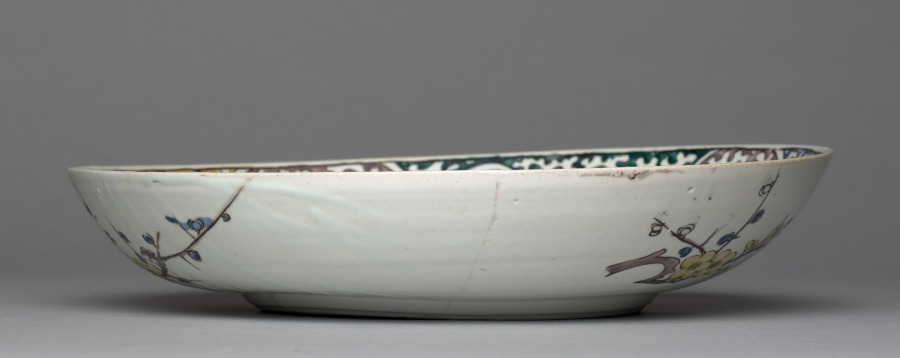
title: Plate with Bird and Flower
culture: Japan, Meiji period (1868–1912) or Taishō period (1912–26)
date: early 1900s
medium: Porcelain with overglaze enamel (Ko-Kutani revival style)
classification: Ceramic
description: This dish is a sophisticated example of later ceramists reinterpreting earlier styles of Japanese porcelain. The colors and patterns used look similar to some works produced on the island of Kyushu in the1600s and 1700s. However, the idea to combine alternating blocks of yellow, green, purple, and blue with a "Chinese grasses" (karakusa) pattern around the rim of the dish is one hit upon in the early 1900s by an artist familiar with the colors and patterns of earlier works.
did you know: Porcelain must be fired at a high temperature to achieve its strength and semitranslucent surface.